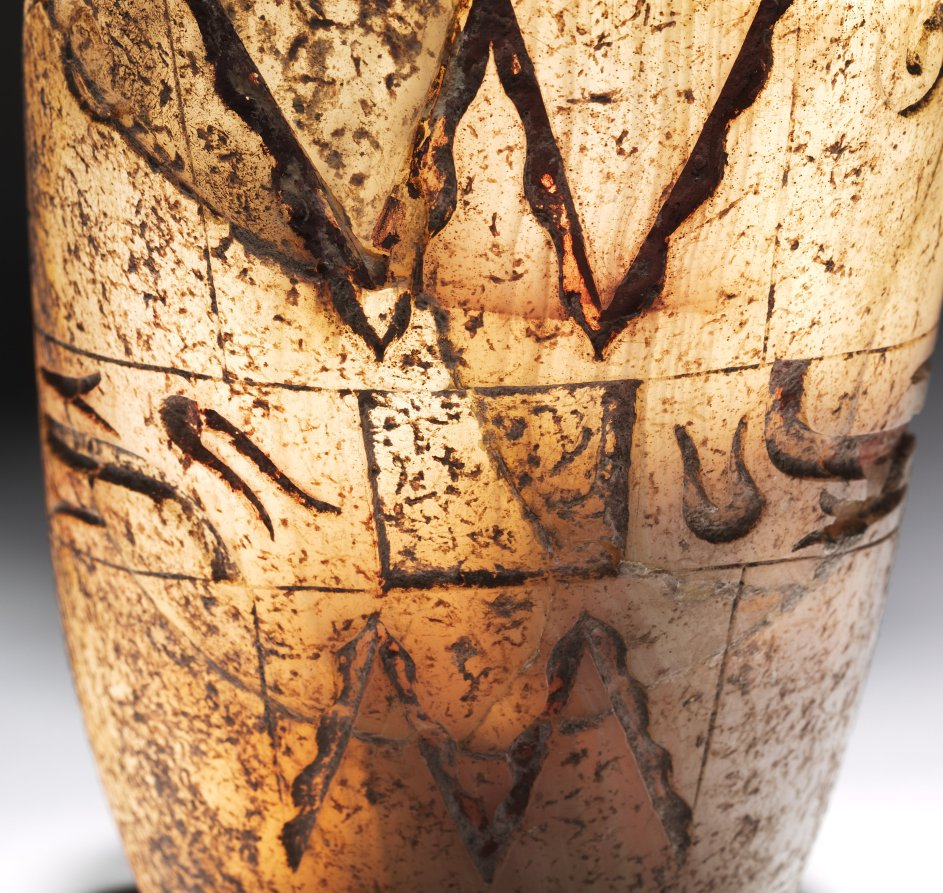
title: Carved Bowl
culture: Mesoamerica, reportedly the Tepecoacuilco River Valley, Guerrero, Olmec style (1200-300 BC), Formative Period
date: 1200–300 BCE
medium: stone (travertine)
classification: Stone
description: Containers made of translucent white travertine, known among the later Aztecs as tecali, are rare in Olmec artistic production. The shape of this elegant example, its rim pinched inward at the center, may refer to a squash. The meaning of the deeply carved abstract motifs, which retain traces of red pigment, is unknown. The bowl is said to have been found in a burial cache that included an Olmec figurine, a hematite mirror, and jade ornaments in Guerrero, Mexico.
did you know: Travertine is a type of limestone deposit commonly found in caves and hot springs.